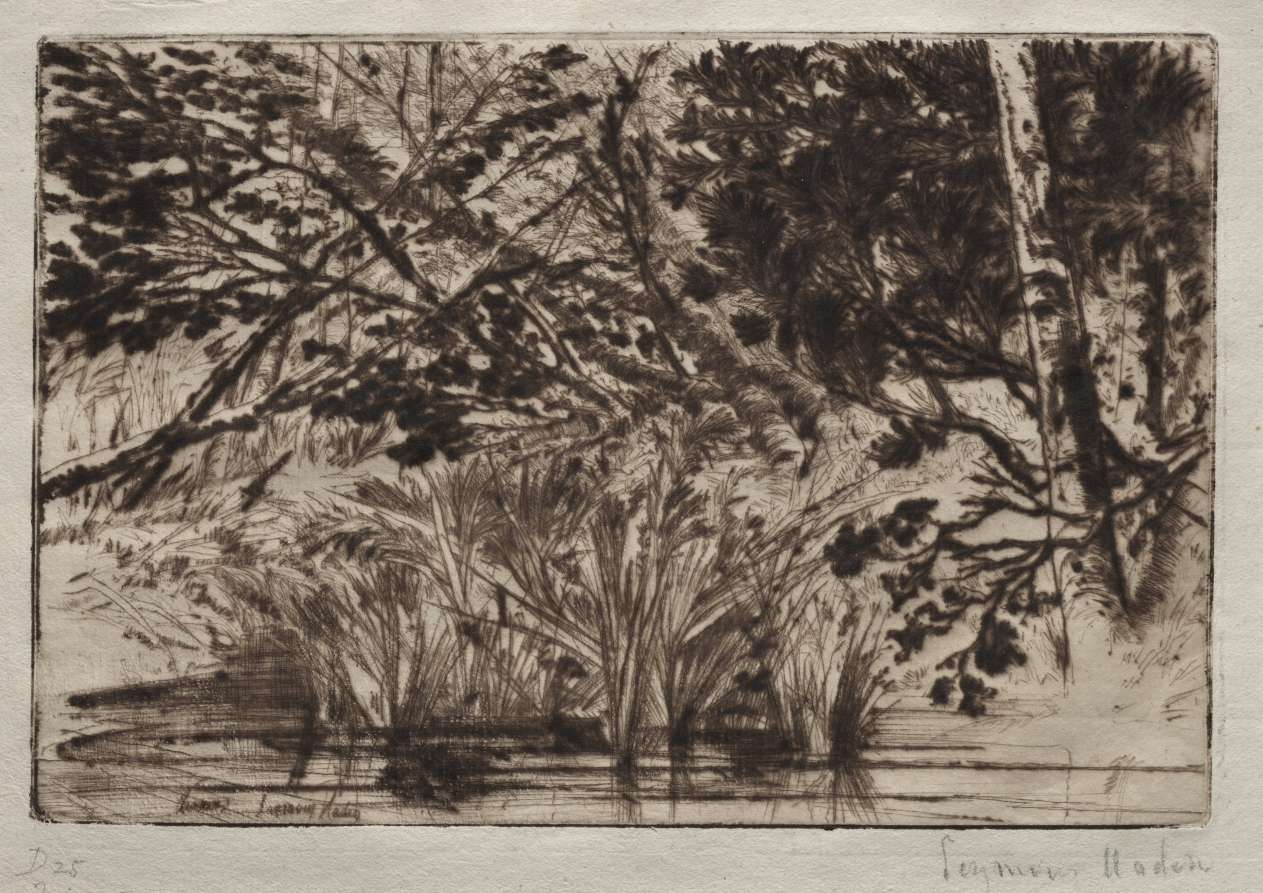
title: The Mouth of a Brook (Second Plate)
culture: England, 19th century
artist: Francis Seymour Haden (British, 1818–1910)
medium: drypoint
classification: Print